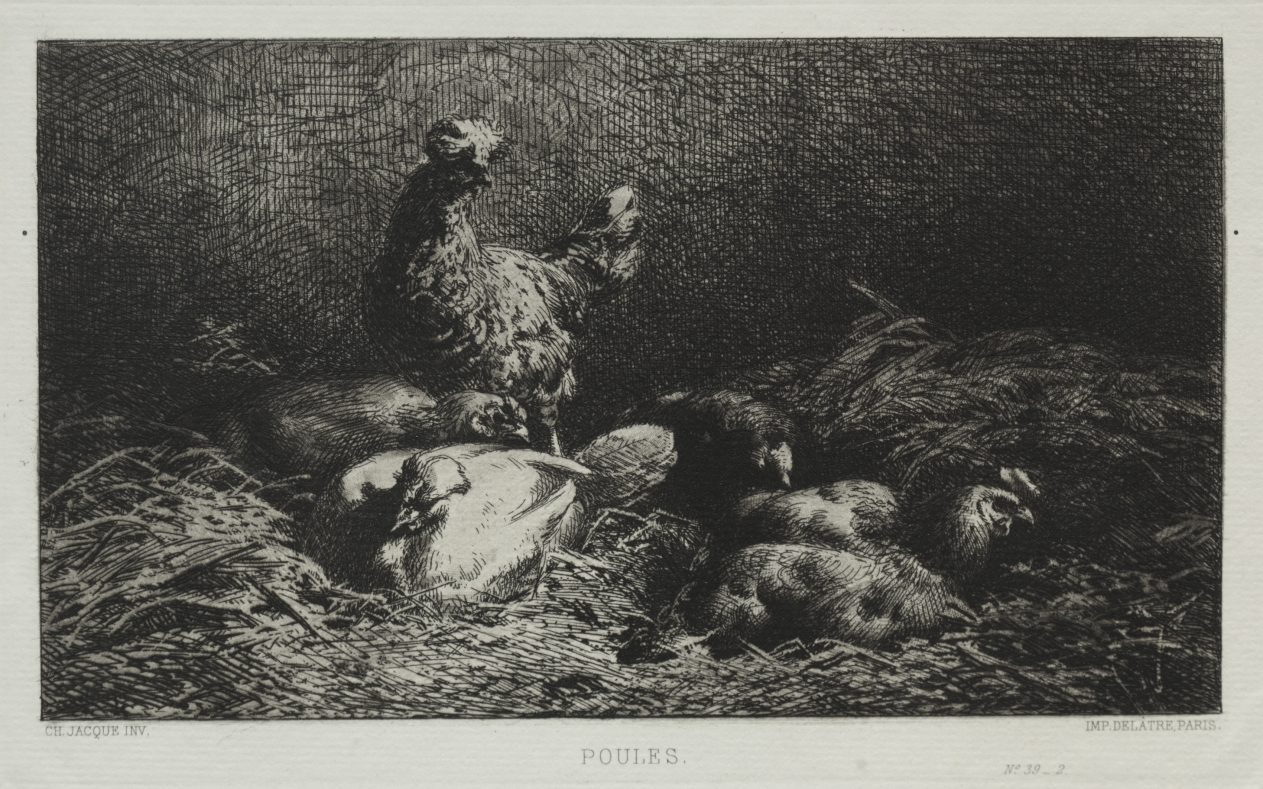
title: Chickens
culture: France, 19th century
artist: Charles-Émile Jacque (French, 1813–1894)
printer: Auguste Delâtre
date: 1867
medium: etching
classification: Print